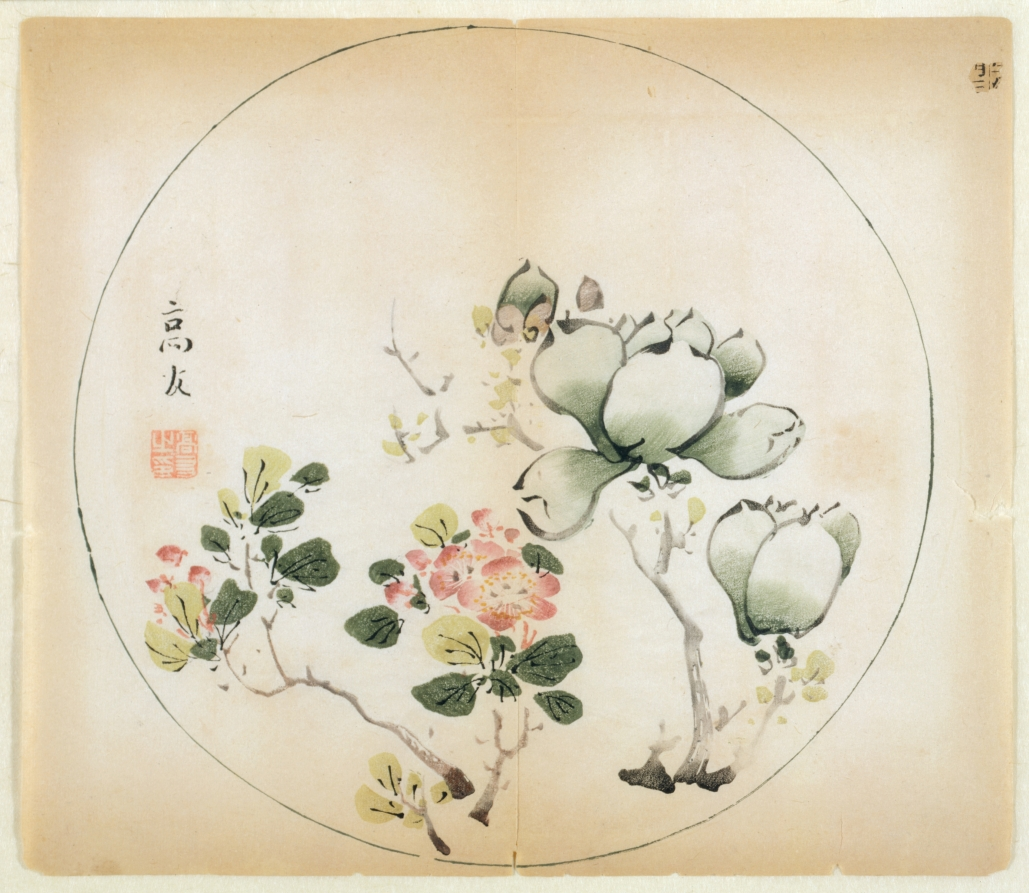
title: Flowering Magnolia and Peach Blossoms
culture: China, Ming dynasty (1368-1644) or later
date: 1368–1644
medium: color woodblock print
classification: Print